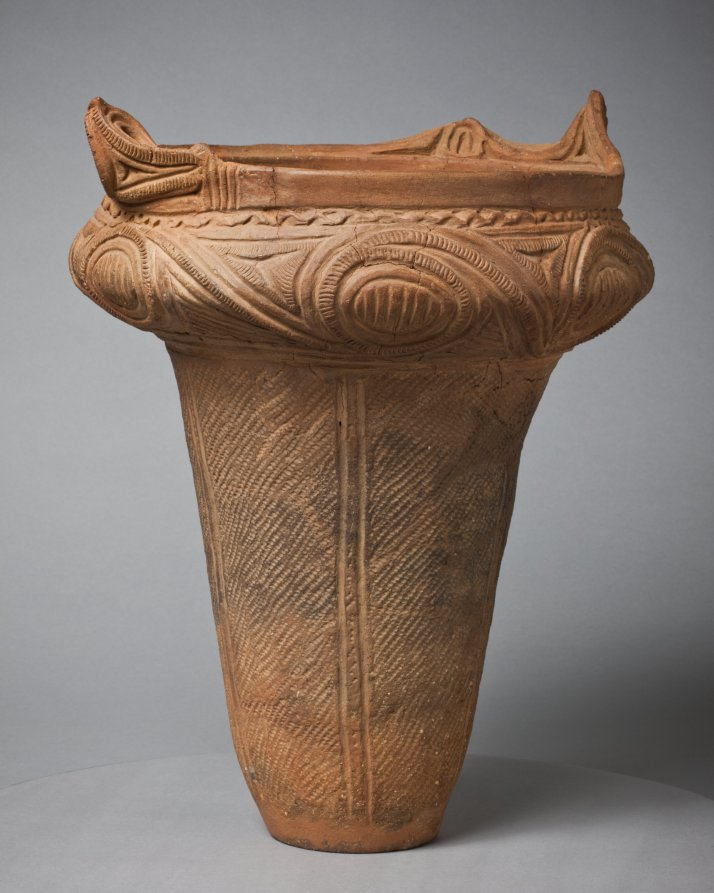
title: Urn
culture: Japan, Jōmon period (c. 10,500–300 BCE)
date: c. 2000 BCE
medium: earthenware, terracotta, impressed and incised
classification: Ceramic